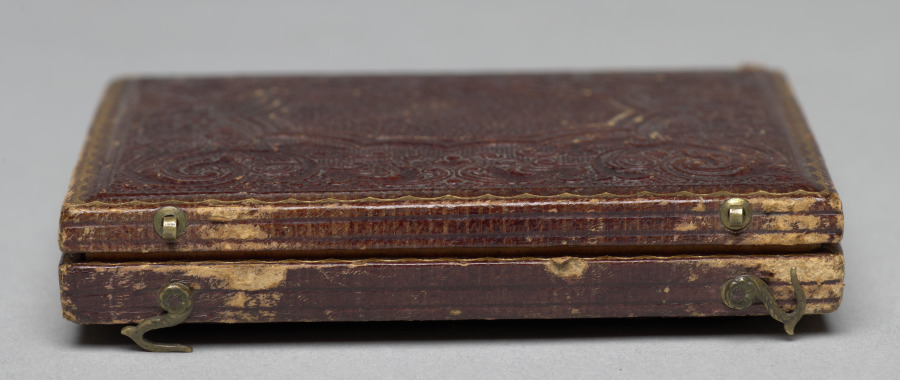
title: Urban Worker Smoking Tyrolean Pipe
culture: America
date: c. 1855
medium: ambrotype, sixth plate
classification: Photograph